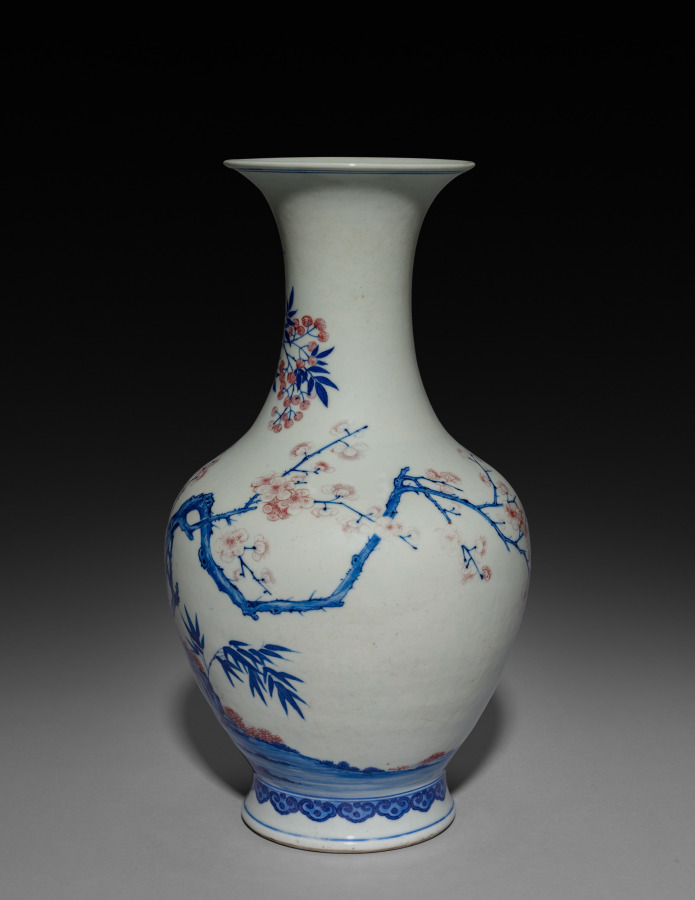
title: Vase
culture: China, Jiangxi province, Jingdezhen kilns, Qing dynasty (1644-1911), Yongzheng reign (1723-35)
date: 1723–35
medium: porcelain with underglaze blue and red decoration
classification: Ceramic